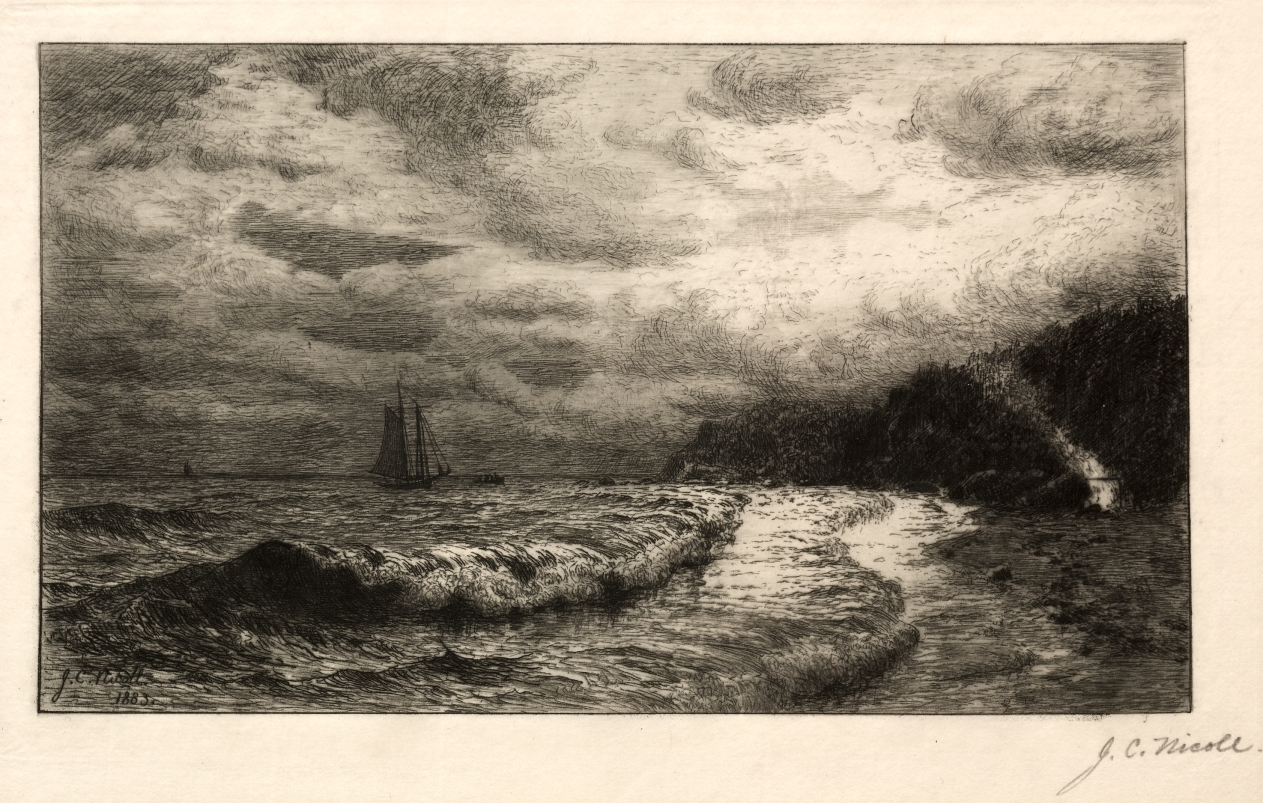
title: The Smuggler's Landing Place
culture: America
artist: James Craig Nicoll (American, 1847–1918)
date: c. 1883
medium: etching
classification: Print